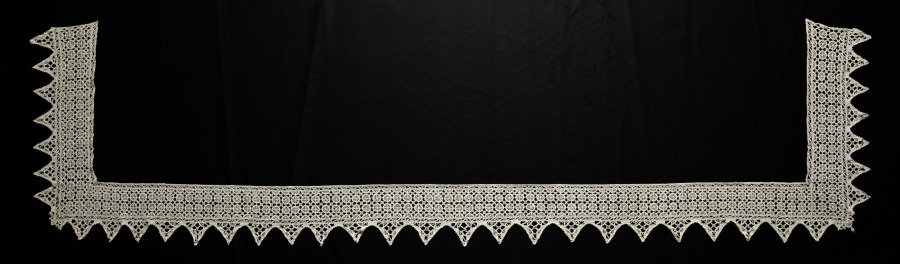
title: Lace Fragment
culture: Italy, 1700s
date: 1700s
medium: Linen: needle lace (Reticella) and cutwork edging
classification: Lace